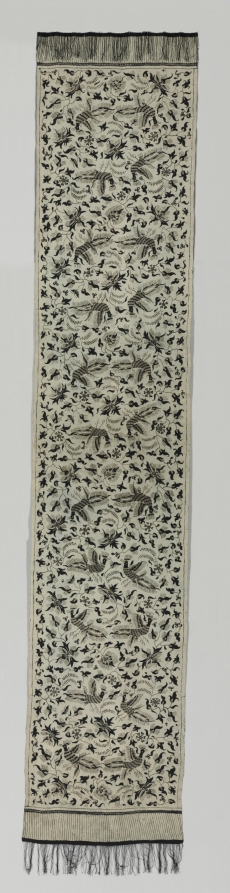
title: Slendang (Shoulder Cloth)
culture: Indonesia, Java, North Coast, 19th - early 20th century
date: 1800s-early 1900s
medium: tabby weave, batik; silk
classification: Textile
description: Chinese people living in the coastal cities of northern Java made and traded silk batiks like this one. The silk was imported from China, and the motifs were always Chinese. The "luk wan" bird, a variation of the Chinese phoenix that occurs on this shoulder cloth, was one of the most common motifs on silk batiks, as is the greenish color of the background. The striped border was meant to simulate fringe even though each end is actually finished with fringe. Silk batiks were made for export, particularly to Bali where they were worn at festivals by wealthy people.